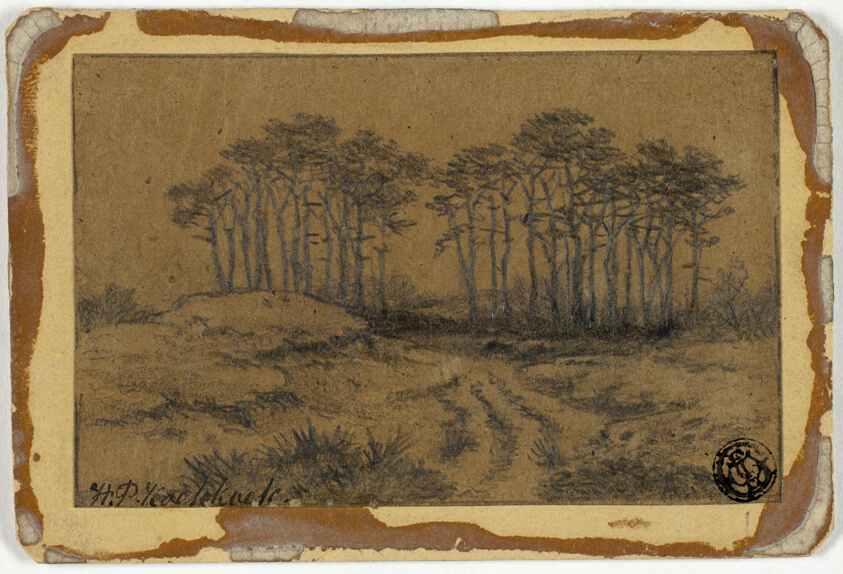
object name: Drawing and Watercolor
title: Path Through Trees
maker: Hermanus Koekkoek (Dutch, 1815-1882)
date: c. 1877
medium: Graphite, on brown wove paper, laid down on board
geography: Holland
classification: graphite; drawings (visual works); prints and drawing